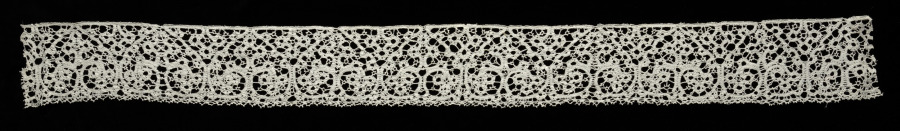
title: Lace Edging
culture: Italy, Genoa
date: 1700s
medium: Linen: bobbin lace (tape lace)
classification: Lace